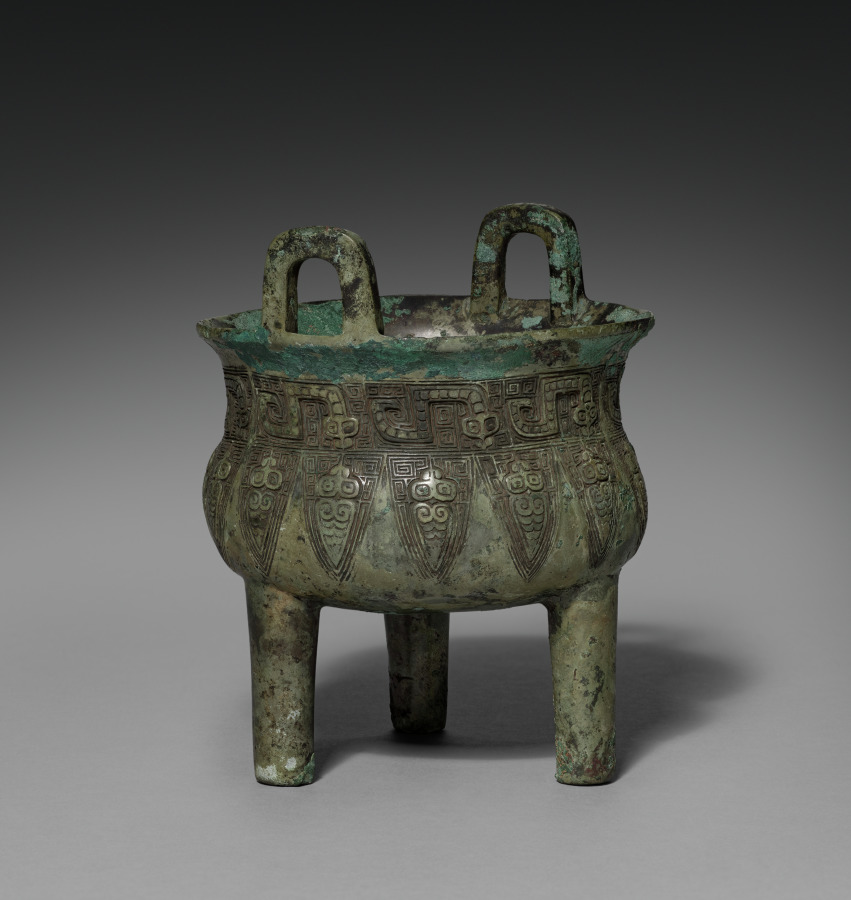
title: Tripod Cauldron (Ding)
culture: China, Shang dynasty (c. 1600–c. 1046 BCE)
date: 1200–1100 BCE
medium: bronze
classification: Metalwork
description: In ancient China, bronze tripods of the type called ding were made in sets of different sizes to be used in rituals in which grain and meat was offered to the spirits of the ancestors. These bronzes were subsequently both collected items and major scholarly preoccupations in Chinese history. They were prized art treasures that provide source materials for Chinese historiography and antiquity studies. Catalogues of archaic bronzes have been published since the Song dynasty. Scholars studied the bronze inscriptions, typologies, and terminologies, and these studies exerted an impact in the field well before the birth of modern art history and archaeology.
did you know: The vessel shows a band of silkworms and cicadas in two registers.